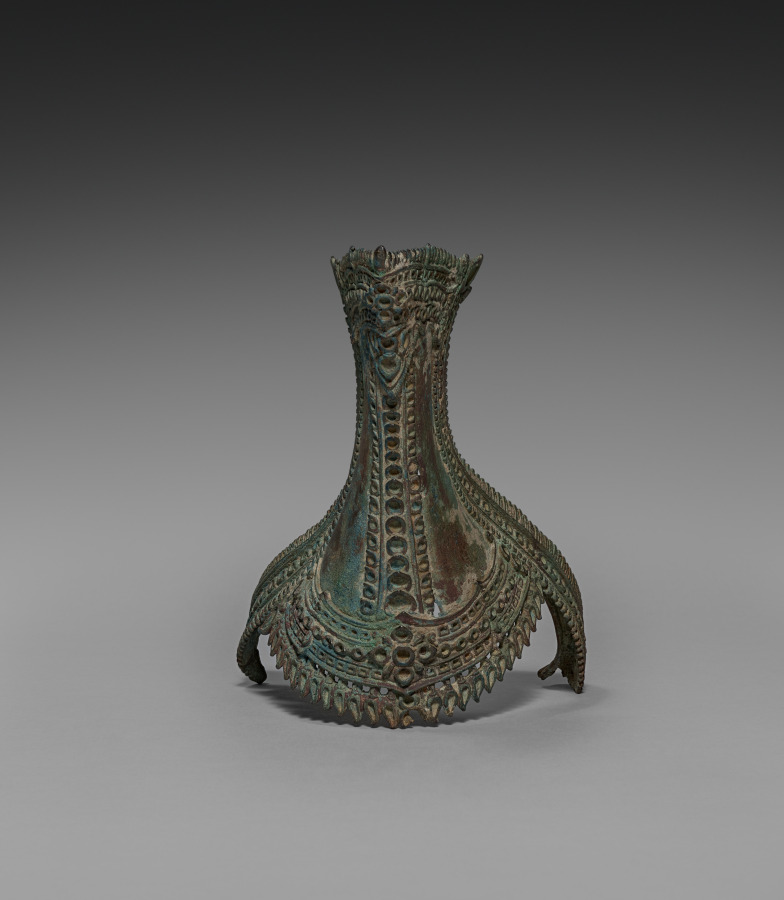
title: Sheath for ritual conch shell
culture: Cambodia, Khmer, Angkor period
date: 1100s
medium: shell and bronze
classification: Sculpture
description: A royal temple like Banteay Chhmar was built for performing rituals and to honor images of gods, Buddhas, and other sacred or enlightened beings for the sake of the kingdom’s protection and ongoing prosperity. Conch shells were blown at the start of rituals to make the sound corresponding to the syllable om. The dancing figure of Hevajra, a Buddhist being of enlightenment with eight heads, sixteen arms, and four legs, has been worked into the bronze embellishment of the shell. Hevajra was elevated to a prominent position in Khmer Buddhism of the Angkorian period as the standard figure denoting the practice of rituals prescribed in a text called the Hevajra-tantra. The tripod stand with three serpents is probably not original to the shell.